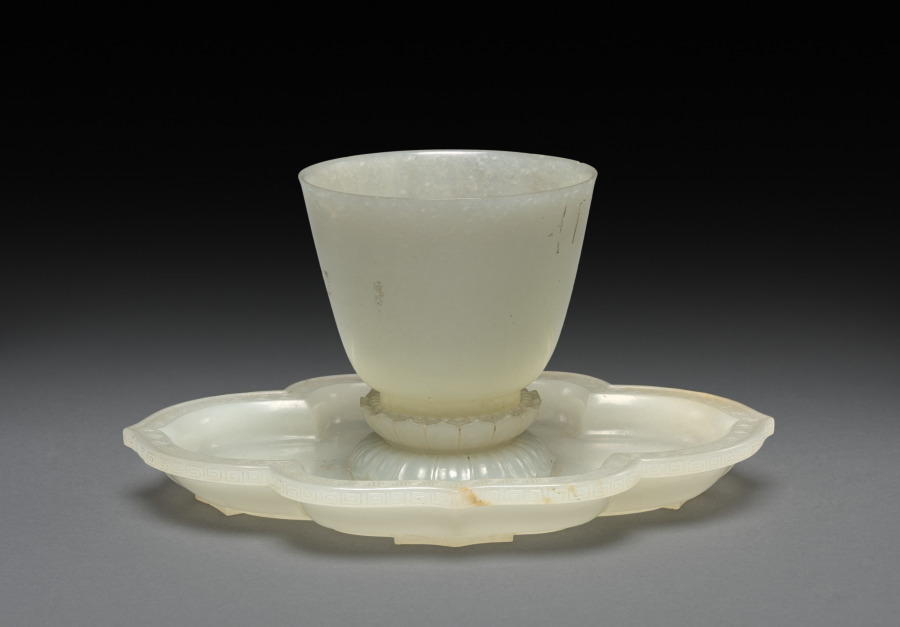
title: Lotus-shaped Dish and Cup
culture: China, Qing dynasty (1644–1911), Qianlong reign (1736–95)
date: 1736–95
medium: jade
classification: Jade